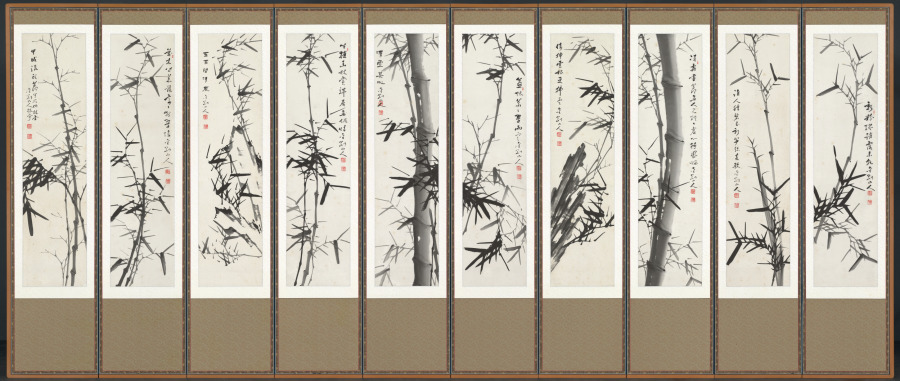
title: Bamboos in Wind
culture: Korea, Japanese colonial period (1910−1945)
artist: Kim Jin-woo (Korean, 1883–1950)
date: 1934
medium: Ten-panel folding screen; ink on paper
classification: Painting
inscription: Two chops stamped on each panel: 振宇之印 (Jinwoo’s Seal); 金剛山人 (Diamond Mountain Man)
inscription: Inscription written on the far-left panel: 甲戌流??寫於竹林堂金剛山人振宇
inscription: Inscription written on the 8th panel: 五百間淸風金剛山人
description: Active during the Japanese colonial period in Korea (1910–45), the artist Jin-woo Kim earned his artistic reputation for his expressive renditions of bamboo swaying in a strong wind. His piercing bamboo shoots are often compared to an iron spear, and their sharp leaves to a knife. It is believed that he deliberately emphasized sharpness in his brushstrokes to express his strong resistance against Japanese colonial oppression.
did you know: The artist’s prolific artistic production were a major part of fundraising efforts to support resistance activities for Korea’s independence.